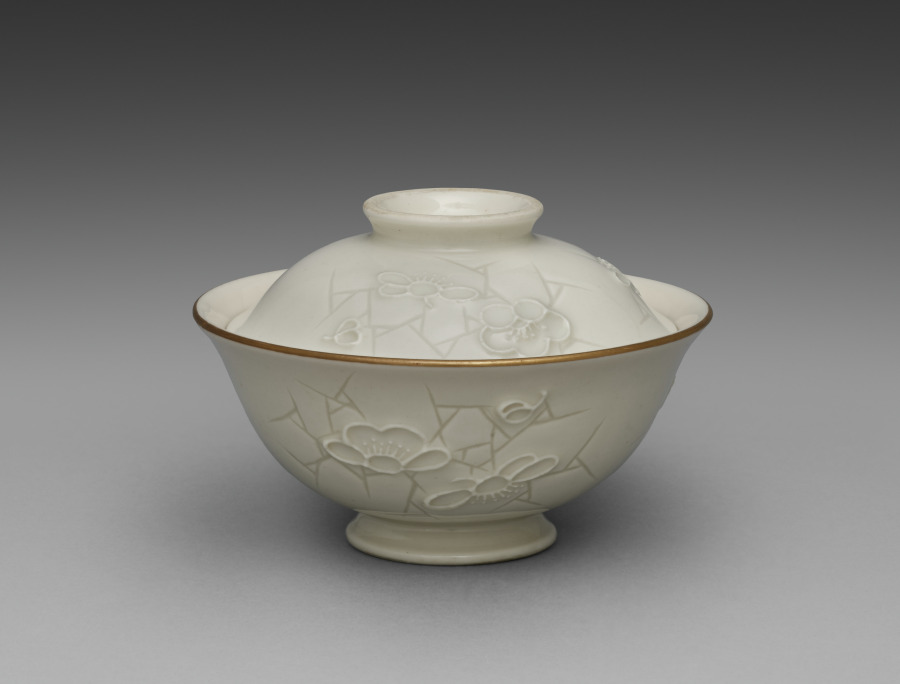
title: Covered Bowl from Dining Set with Plum Blossoms and Cracked-Ice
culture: Japan, Meiji period (1868–1912)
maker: Seifū Yohei II (Japanese, 1844–1878)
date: c. 1875–78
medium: Porcelain with molded designs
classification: Ceramic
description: Each item in this set has a delicate low-relief design of flowering plum branches over scattered, intersecting lines meant to resemble the cracked-ice surface of a frozen body of water and is signed on the base in gold pigment. While Yohei II produced many fine works in underglaze blue, like those produced by Kiyomizu Shichibei, he also made works in quite different styles later in his career, from the early 1870 s. In 1873, he was appointed purveyor to the Industrial Center of Kyoto Prefecture, a designation associated with Kyoto’s efforts to reach an international market through the port of Kobe; and from 1875 until his death, he was involved in national-level projects to present Japanese ceramics across the world. It was during this period that Yohei III was apprenticed to Yohei II, and it has been suggested that this set may in fact be an early example of Yohei III’s work, which he signed with his teacher’s name. Decorated with flowers resembling Japanese textile motifs, the set calls to mind the design of Yohei II’s pair of vases with plum blossoms in the Victoria and Albert Museum. Here, the elaborate trees created for a formal public exhibition setting have been translated into the approachable blossoms of the genteel domestic environment. While the designs are consistent across the pieces, each raised flower petal and pistil and each incised line in the ice was done by hand, so the cups, bowls, and dishes are similar yet unique. The bottoms of two boxes once identified the set’s owner, but the information has been deliberately obscured with black ink. However, inscriptions still visible appear to indicate two occasions, once at the end of July 1886 , and once again in June 1916 , when parts of the set were requested from Hokura in Niigata Prefecture. The location corresponds to a neighborhood in the present-day city of Jōetsu. The surname Tsuji 辻 also appears on a paper tag affixed to one of the box cloths. Future research may possibly reveal more about their provenance. A vase by Yohei III in a private collection combines the formal grandeur of the Yohei II vases in the Victoria and Albert Museum with the gentler design of this dining set, placing flowering plum trees against soft, scalloped-edge clouds resembling those in golden screens.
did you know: The dining wares have a creamy white coloration that the four boxes containing them identify as Korean in style.